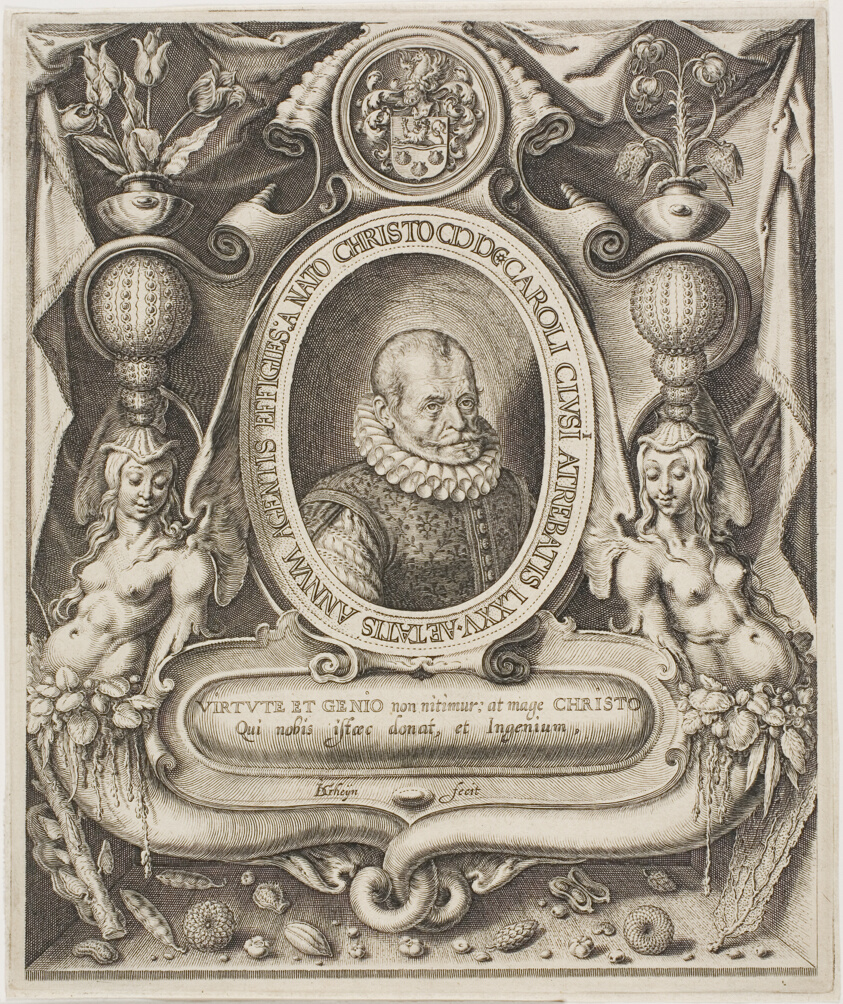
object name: Print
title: Carolus Clusius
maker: Jacques de Gheyn II; Dutch, 1565-1629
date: 1601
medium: Engraving, with stippling, in black on cream laid paper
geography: Netherlands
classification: engraving; print; prints and drawing